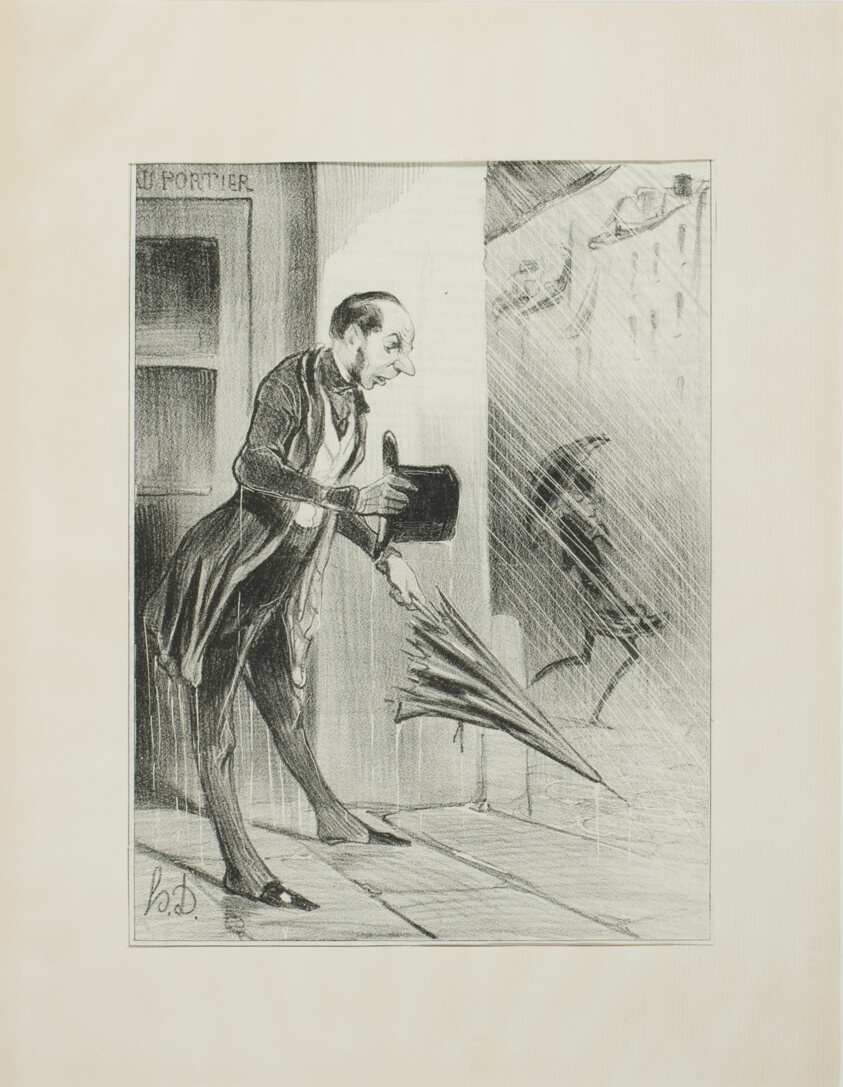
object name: Print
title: New patented umbrella, with an improved spring system, to swiftly open at the slightest touch.(please refer to our advertisement in the matter), plate 33 from Émotions Parisiennes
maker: Honoré Victorin Daumier; French, 1808-1879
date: published 1842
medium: Lithograph in black on ivory wove paper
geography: France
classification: lithograph; print; prints and drawing